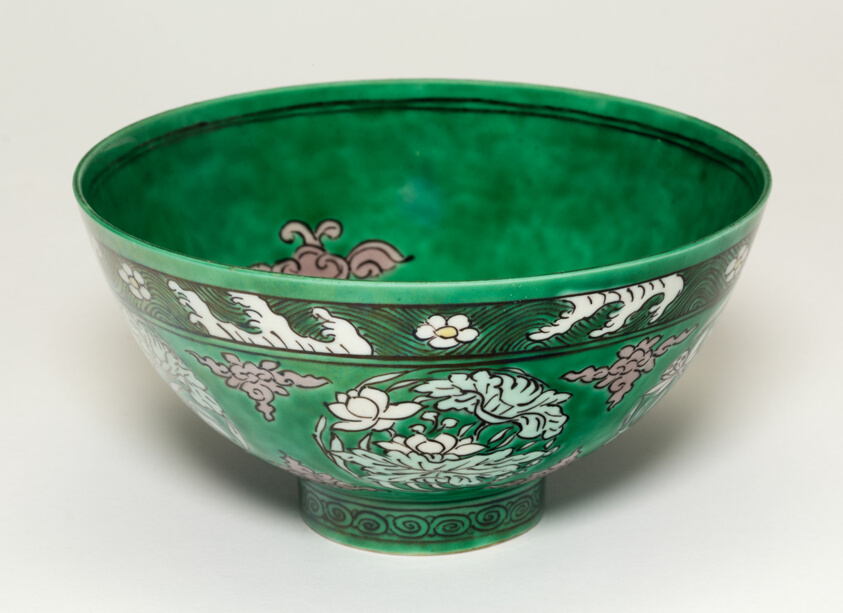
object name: Vessel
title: Bowl with Floral Medallions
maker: China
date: Qing dynasty (1644–1911), Kangxi reign mark and period (1662–1722)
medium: Porcelain painted in green, yellow, and aubergine glaze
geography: China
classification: porcelain; asian art; ceramics; vessel